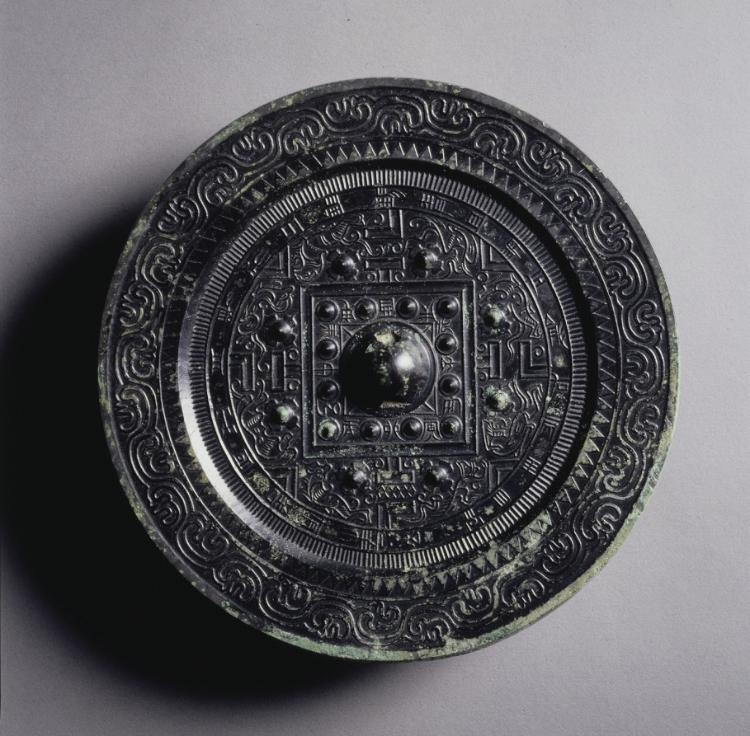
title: TLV Mirror with Multiple Nipples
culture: China, Xin dynasty (9–23 CE)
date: 9–23 CE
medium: bronze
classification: Metalwork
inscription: 新有善銅出丹陽， 和以銀錫青且明。 左龍右虎主四澎（旁） 八子。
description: TLV mirrors of the Han dynasty were named after the motifs resembling the letters T, L, and V. Their meaning relates to cosmology. A concentric band of characters around the central knob reads, Good copper of the current Xin dynasty was mined at Danyang. / Mixed with white tin, the alloy is clear and bright. . . . Danyang county in Jiangsu province was rich in metal resources. Mirrors mentioning Danyang were found in Zhejiang, Hubei, Henan, Hunan, and Shanxi provinces, which suggests their export beyond Jiangsu. Alternatively, competing mirror makers elsewhere could have used Danyang as an early type of branding.